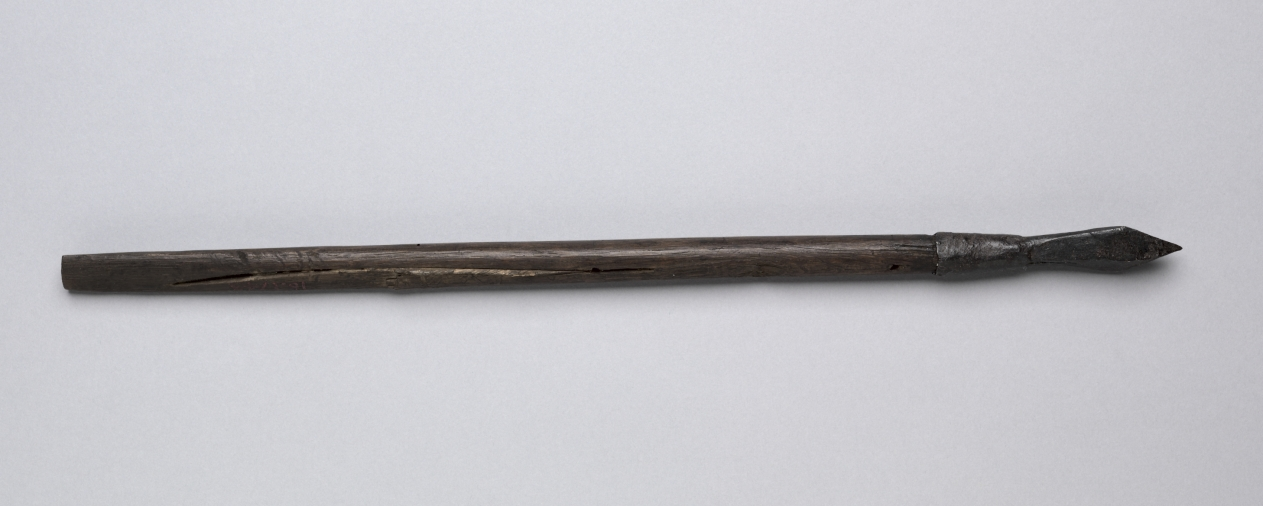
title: Crossbow Bolt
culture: Germany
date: 1500s-1600s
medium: wood, leather, steel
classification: Arms and Armor